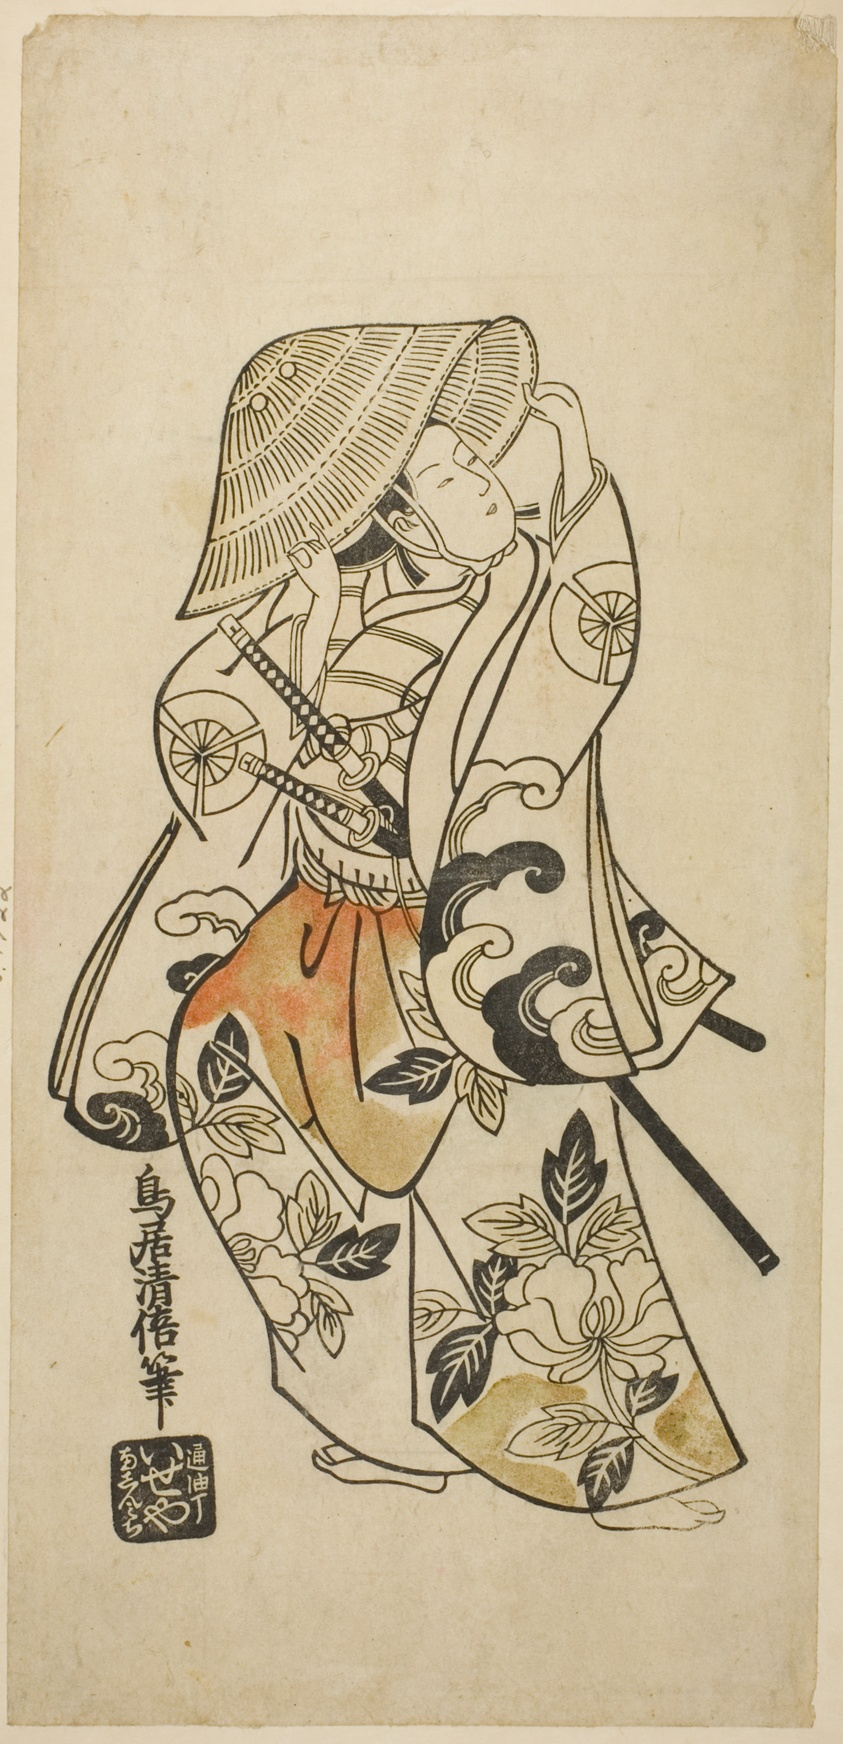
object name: Print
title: The Actor Tamazawa Saijiro in an unidentified role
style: Japanese (culture or style)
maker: Torii Kiyomasu II (Japanese, 1706 (?)–1763 (?))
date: c. 1740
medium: Hand-colored woodblock print; hosoban, urushi-e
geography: Japan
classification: woodblock print; print; asian art